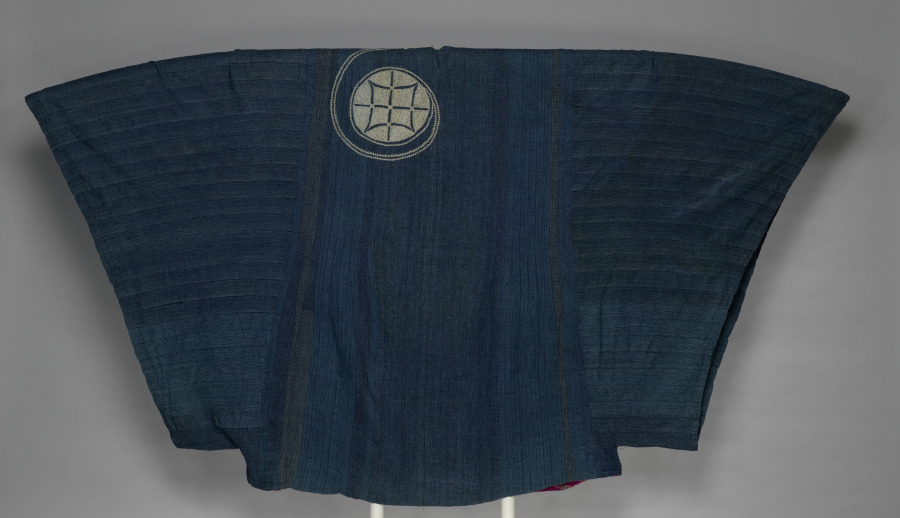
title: Prestige robe (riga)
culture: Africa, West Africa, Nigeria, probably Hausa-style or Nupe-style weavers and embroiders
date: late 1800s–by 1910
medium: Cotton, silk, and indigo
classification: Garment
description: Elite Nigerian men wore voluminous status garments variously called riga (Hausa), agbádá (Yorùbá), boubou (French), or mbubb (Wolof). Punctuated with white silk, this strip-woven riga’s inky blue was achieved by repeatedly dipping threads into indigo dye before weaving them. Embroiderers were often skilled Arabic calligraphers; the motifs here once had protective Islamic symbolism. The front pocket features the pointed “eight knives” (aska takwas) and a leaf (gambiya) associated with the Nupe peoples. At back, a spiral leads the wearer toward God. Magenta silk imported via trans-Saharan routes lines the hem. Rigan historically held transcultural appeal; today, they are pan-Nigerian male national dress.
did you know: Its owner's movements would have revealed a flash of magenta silk (an expensive trade good) along the hem of this riga, emphasizing his high status.